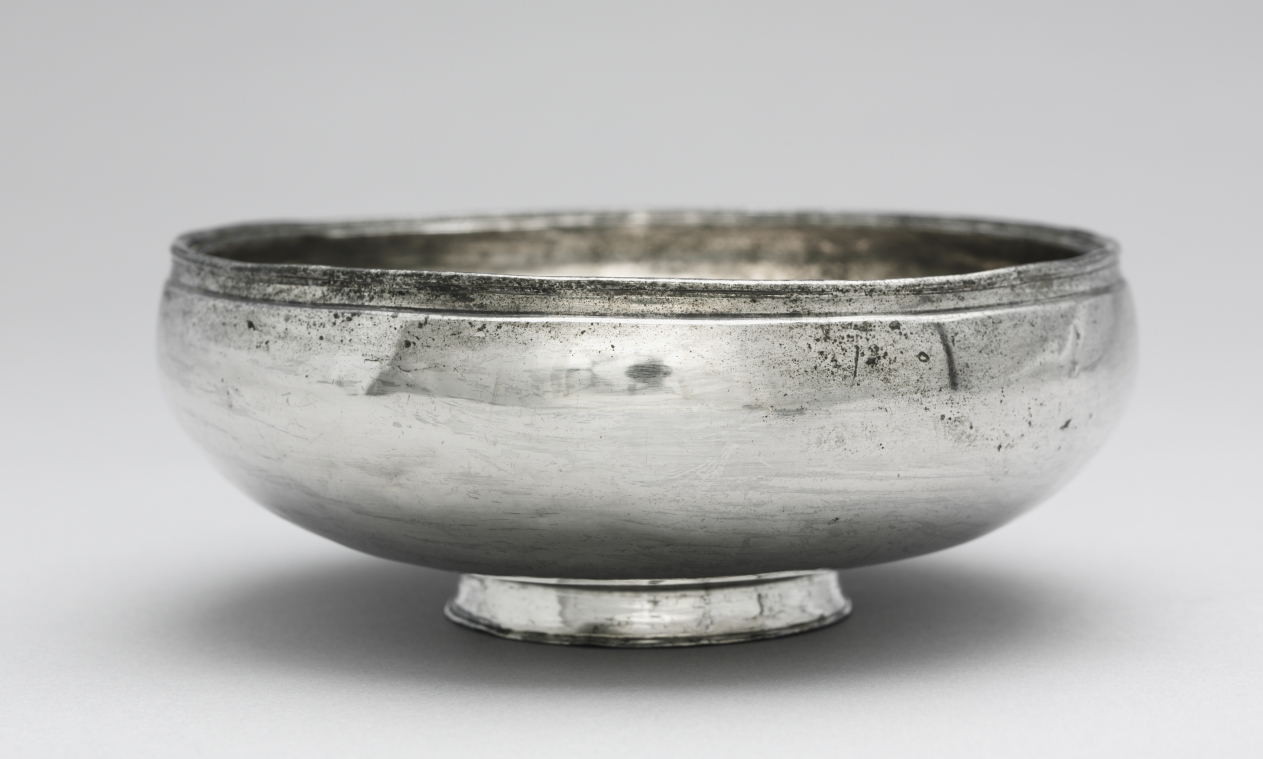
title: Bowl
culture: Byzantium, Syria(?), Byzantine period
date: 350–450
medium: silver with niello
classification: Metalwork